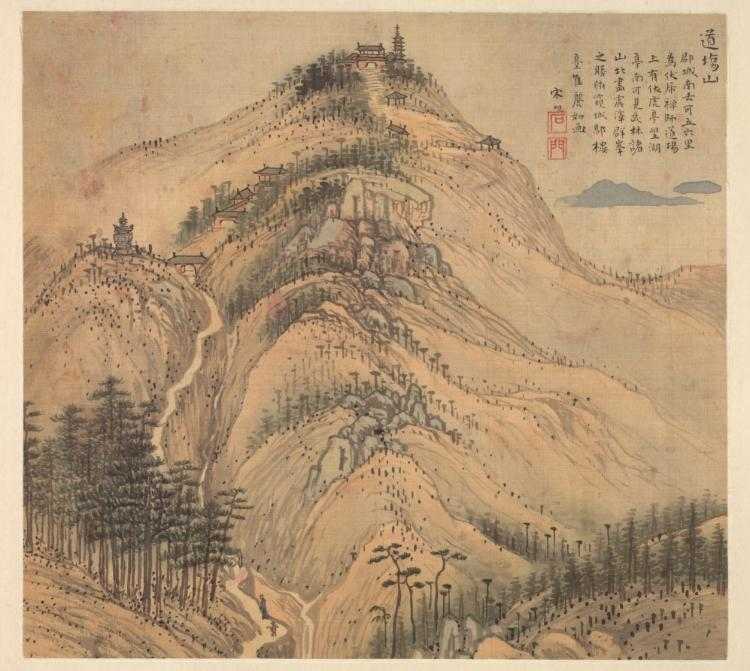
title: Mt. Daochang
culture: China, Jiaxing, Ming dynasty (1368–1644)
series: Eighteen Views of Huzhou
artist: Song Xu (Chinese, 1525-c. 1606)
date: c. 1588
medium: Album leaf; ink and color on silk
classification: Painting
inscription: 道場山：郡城南去，可五六里，為伏虎禪師道場。上有伏虎亭、望湖亭。南可見武林諸山。北盡震澤群峯之勝。俯窺城郭樓臺，佳麗如畫。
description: This album of landscape paintings depicts the famous scenic areas located in and around the city of Wuxing in southeastern China. These places were all known for their natural beauty, but in addition, a number were distinguished by their links to eminent historical figures and events. The artist, Song Xu, was not a native of Wuxing, but must have visited it when he accepted the commission, for he carefully depicted all eighteen views and wrote comments on each of them. Song's gazetteerlike notation on this leaf reads: Mount Daochang: From the prefectural city toward the south, about 5 to 6 li, there is the spiritual abode of Chan Master Fuhu [master who tamed tigers, or Zhifeng 志逢, 909–985]. On top [of the hill] are the Fuhu and Wanghu Pavilions. Looking farther south, one can see the mountains of Hangzhou. Looking toward the north, one can see all the way to Lake Tai and its hilly islands. Looking down, the city walls below with its towers and terraces are as splendid as in a painting.